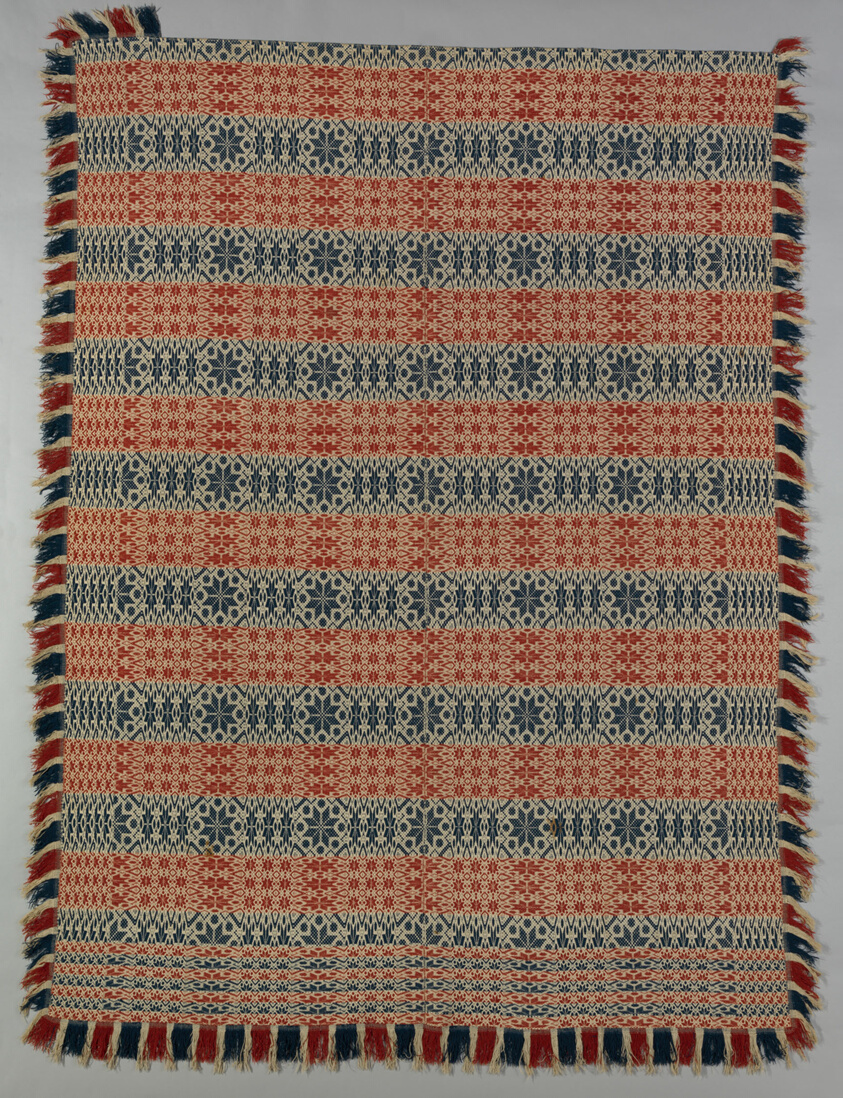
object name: Textile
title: Coverlet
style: American Fancy, Star work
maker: United States, Probably Pennsylvania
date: 1820-40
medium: Cotton and wool, composite point twill weave (star work, multiple shaft); two loom widths joined; with attached plain weave strip with weft fringe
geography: Pennsylvania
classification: weaving - coverlet; coverlet; weaving; textile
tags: stars, coverlet, geometric motif, circles, star work